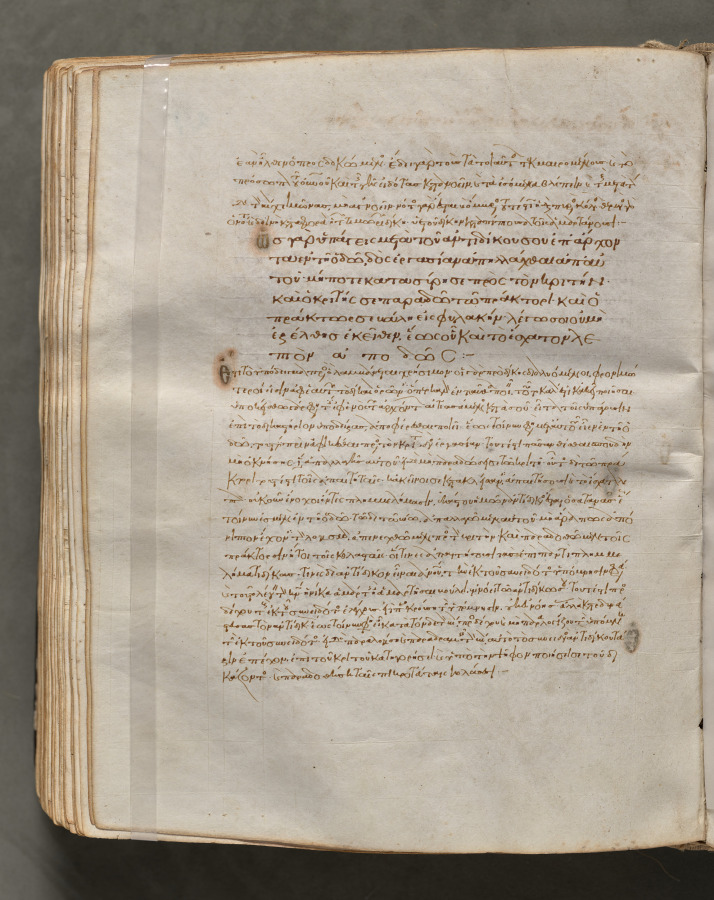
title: Text, folio 271 (verso), from a Gospel Book with Commentaries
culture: Byzantium, Constantinople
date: c. 1000–1100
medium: ink, tempera, and gold on vellum; leather binding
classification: Bound Volume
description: Each of the four gospels in this book opens on a page with brilliantly illuminated borders depicting the author of the text as well as birds—principally peacocks, symbols of the immortality of the soul—and fountains, representing the fountain of life and the salvation of the soul. This volume consists of 428 leaves with texts in Greek. Its level of sophistication suggests that it was probably written and decorated in a monastery in Constantinople.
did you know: Gospel books were carried in procession through Byzantine churches.